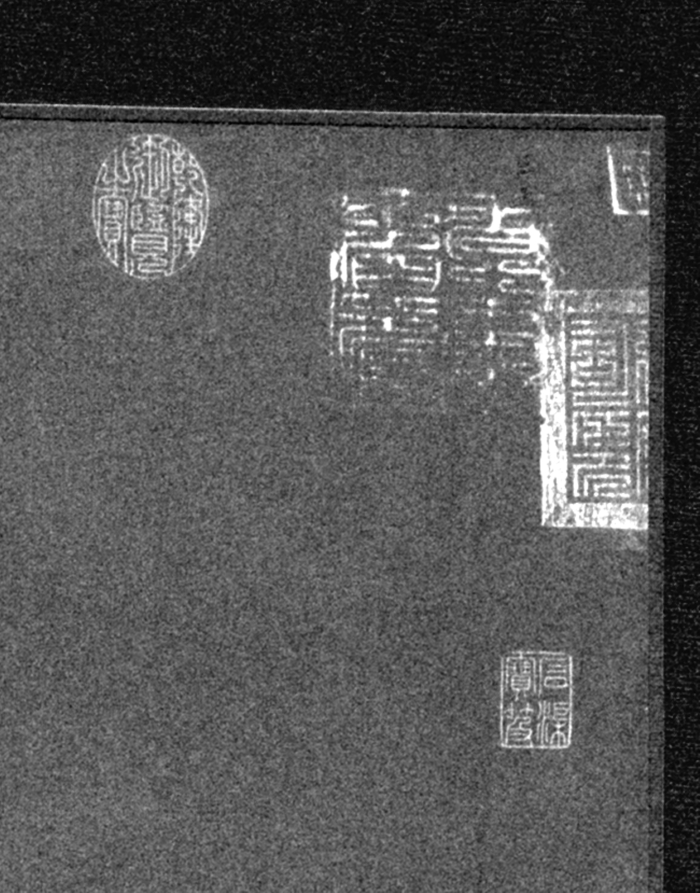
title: Buddhist Retreat by Stream and Mountains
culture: China, Northern Song dynasty (960-1127)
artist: Juran (Chinese, active 960–985)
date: 960–85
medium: Hanging scroll; ink on silk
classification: Painting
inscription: The upper portion of the scroll: the two small characters, “Ju wu 巨五”, written near the large seal. Written by a functionary in Shang Shu Sheng (the Department of State Affairs) when the painting was first received.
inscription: The upper portion of the scroll: the large seal, “Shang Shu Sheng yin 尚書省印” (seal of the Department of State Affairs)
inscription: The upper portion of the scroll: the half-seal “Si yin 司印”, seen along a border. Attributed to 典禮紀察司 of Ming dynasty.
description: Monk Juran served the Southern Tang (937–75) imperial house in Nanjing, where he studied with Dong Yuan (active 930s–60s). Both founded the southern landscape tradition, or Jiangnan school, known for gentle misty riverscapes in wet ink. Juran moved north to Kaifeng when the Southern Tang surrendered to the Northern Song, the impact of which may be seen in this painting, presumably painted after 976. A towering mountain dominates the composition, typically representing the style of the Northern Song academy; while the use of long hemp fiber strokes to texture the mountains, wet dots, and round boulders on mountain tops are elements of the southern landscape tradition.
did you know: This hanging scroll with the towering mountain is a prime example of the monumental landscape style of Northern Song.